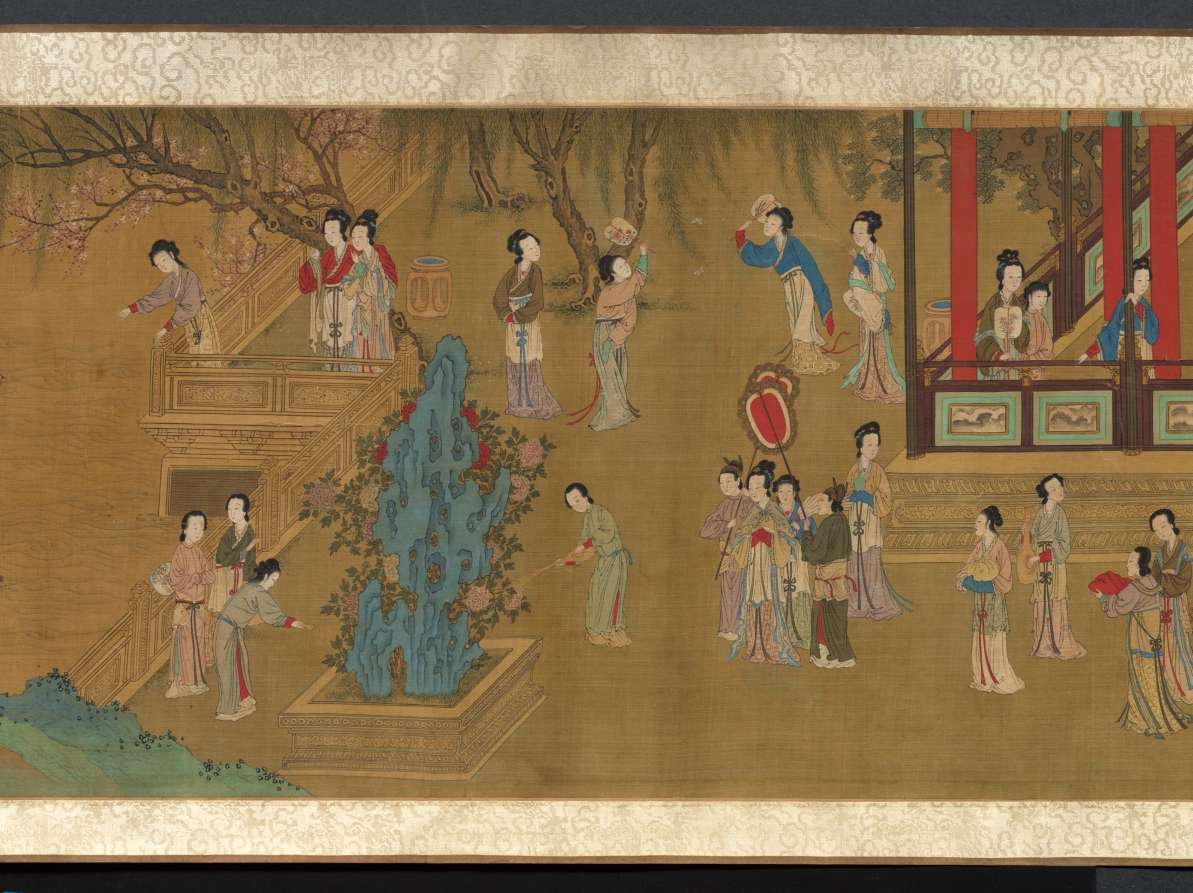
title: Palace Ladies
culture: China, Qing dynasty (1644-1911)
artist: copy after Qiu Ying (Chinese, 1494–1552)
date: 1644–1911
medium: handscroll, ink and color on silk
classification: Painting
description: This handscroll illustrates the pursuits of court ladies in a palace precinct on a spring day. Women, young girls, and their maids amuse themselves by sitting on a swing, playing games, watering and admiring peonies, performing music together, playing the qin (zither), feeding a parrot on the balustrade and fish in the water, or catching butterflies. The life of elite women was mostly restricted to the so-called inner quarters, meaning the garden and inner courts of the house. This painting idealizes the world of young palace girls that in fact was often filled with boredom and waiting for a lover.